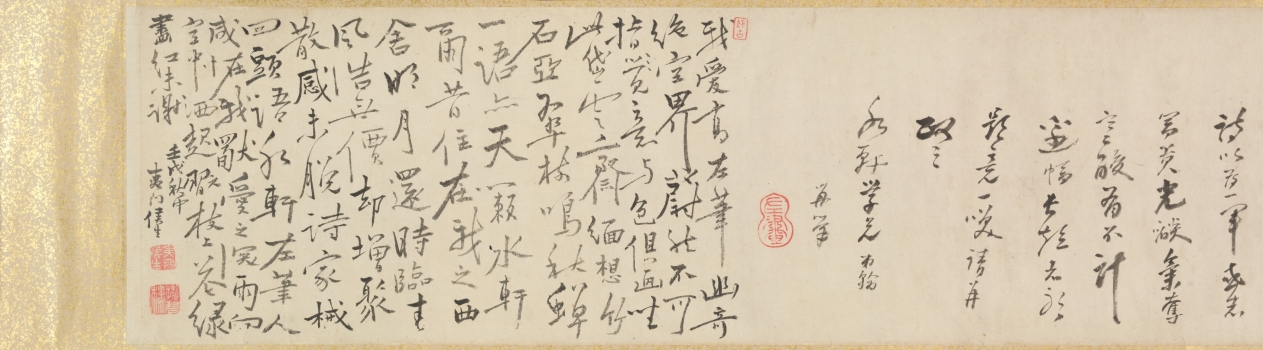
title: Plum Blossoms and Peonies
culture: China, Qing dynasty (1644-1911)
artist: Gao Fenghan (Chinese, 1683–1749)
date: 1741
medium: handscroll, ink on paper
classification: Painting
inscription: Artist's 2 inscriptions and 9 seals (the painting of Peonies with the artist's colophon and the colophon by Hou Chia-fan are on a single sheet of paper). Artist's inscription and 2 seals (Plum Blossoms): [seal] Ts'ai-yün. After finishing writing my colophon, I unrolled the painting to take another look, and it now seems that the composition here should have moved to the later part of the scroll. If that is the case, then the "Cool Beauty" [prunus] of the Solitary Hill is after all unable to take precedence over the "King of Flowers" [peony]. A laugh. Lao-fou inscribed. [seal] Feng-han. Artist's colophon (Plum Blossoms): [3 seals] Tun; Yen-yün-kung-yang, Hou-shang-tso-sheng. A few days after I painted this scroll for Shui- hsien [Yüeh Meng-yüan], the plum blossoms were in full bloom at his residence. He invited me over to enjoy them together for a long while, and I composed two additional poems and wrote them down here for his criticism. [Poems on the colophon are not translated.] First month, twenty-first day, your junior, Kao Feng-han of Nan-fou drafted this with the left hand. [seal] Feng-han. Artist's inscription and 4 seals (Peonies): Brushed with the left hand in the hsin-yu year [1741]. [seal] Yu-hsi. [3 seals at end of painting] Hou-shang-tso-sheng; Yen-yün-kung-yang; Shih-tsao-wu. Artist's colophon and seal (Peonies): The imperial concubine from the Yang family loved to dress in red, And from the emperor won the title of Hai-t'ang. But ever since she became the new dream of the moon palace, She changed into rainbow colors, while learning to dance. After I wrote the poem on Looking for Plum Blossoms in the Teng-wei Mountains, I attached to it a few branches of prunus, some bamboo tips and a piece of rock, with a scattering of green [moss] here and there to fill up the scroll. Unexpectedly, my playful fascination [with these subjects] was still not quite satisfied, so I made up these amorous ideas and romantic images [of the peony], to follow the footsteps of the fair lady of the Ku-hsieh Mountain [prunus]. Furthermore, I picked out one poem to be my vanguard. Perhaps such luminosity of wealth and power will be enough to overwhelm the poor fellows, and [they] will not mind the comparatively short length [of paper] assigned to it. Amusingly inscribed. Please correct me again. To Shui-hsien, my learned senior, your junior Han inscribed again. [seal] Tso-hua [left-handed painting]. 1 additional colophon and 5 additional seals: 1 colophon, dated 1742, and 3 seals of Hou Chia-fan (act. ca. 1742); 1 seal of P'u Ch'üan (20th c.?); 1 seal of Li family (dates unknown).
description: One of the so-called Yangzhou Eccentrics (a group of painters who lived in Yangzhou and were known for their unorthodox art and lifestyle), Gao Fenghan depicts China’s two most loved flowers in full bloom—the “cold beauty,” or plum blossom, in the first section, and the “king of flowers,” or peony, in the second section. Painted in 1741, the year when Gao decided to leave the south and return home to Shandong province in eastern China, this work was likely a token of farewell. His casual brushwork may indicate his mental and physical struggle at the time. After having crippled his right hand in 1737, Gao used his left hand to paint and achieved a crudeness and eccentric style unattainable before.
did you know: In East Asian art, peonies traditionally symbolize prosperity and wealth.